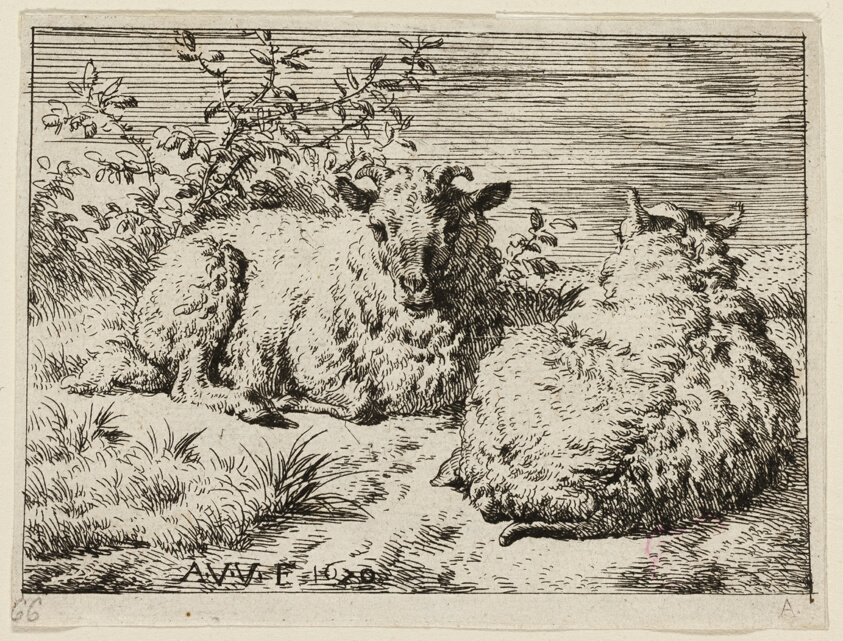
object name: Print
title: Two Sheep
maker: Adriaen van de Velde (Dutch, 1636-1672)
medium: Etching on ivory paper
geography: Holland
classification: etching; print; prints and drawing